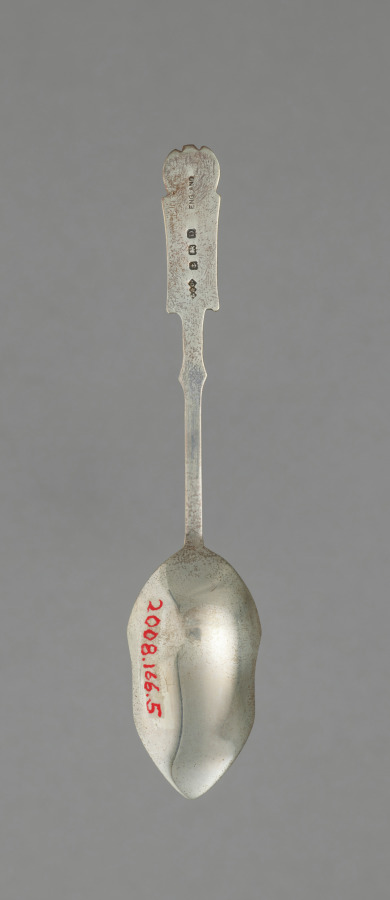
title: Set of six Spoons in Original Box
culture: England, London, 19th century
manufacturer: Liberty and Company (British)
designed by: attributed to Archibald Knox (British, 1864–1933)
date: c. 1895–1910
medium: Silver, enamel decoration and leather box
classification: Silver